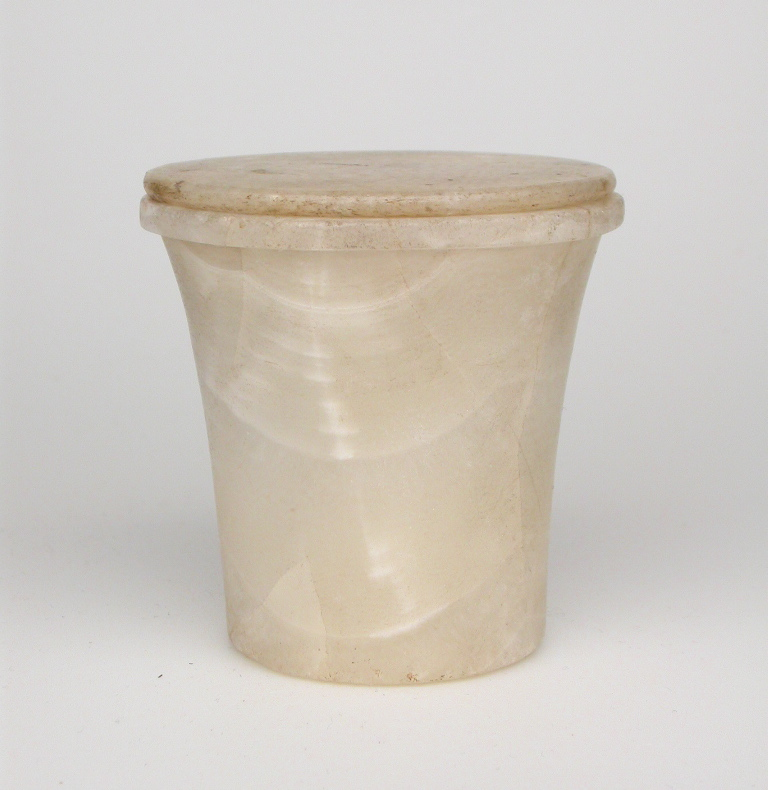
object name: Vessel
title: Unguent Vessel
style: first dynasty, early dynastic (egyptian)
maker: Egyptian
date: Old Kingdom–Middle Kingdom (?), Dynasty 3–12 (about 2686–1773 BCE)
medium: Travertine (Egyptian alabaster)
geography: Egypt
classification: personal grooming / hygiene / cosmetic container; stone; vessel; ancient art